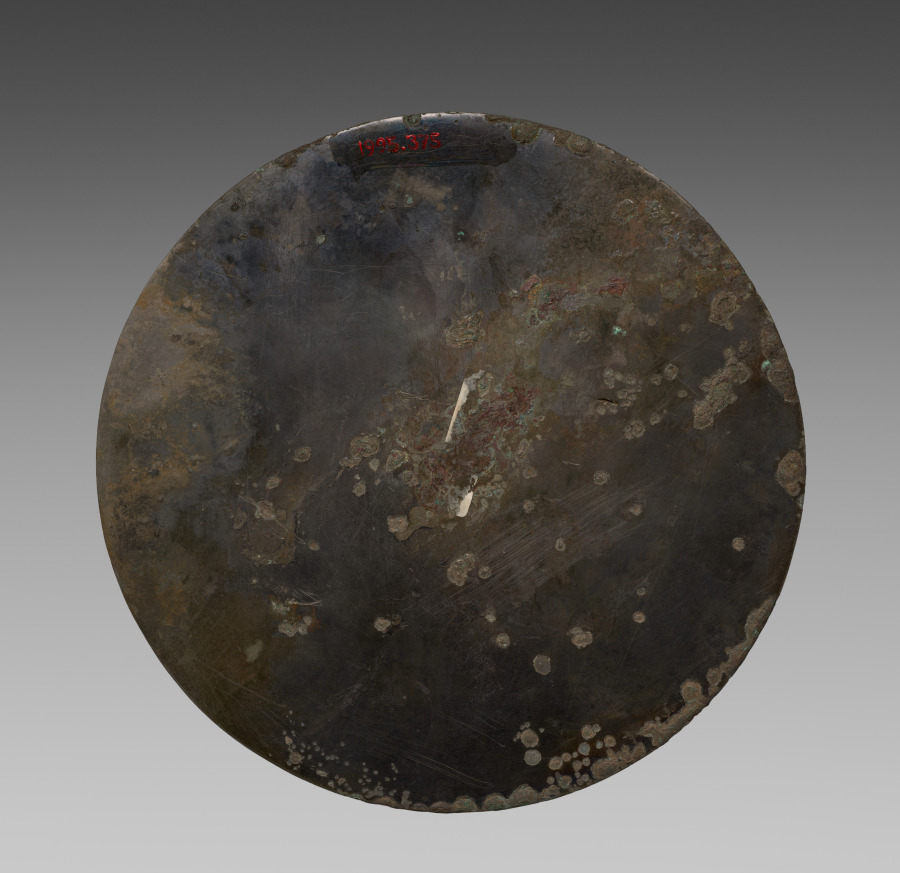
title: Octafoil Mirror with Lunar Palace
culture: China, Jin dynasty (1115–1234)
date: early 1100s–mid-1200s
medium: bronze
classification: Metalwork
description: Bronze mirrors typically have one polished and one decorated side and were used in tombs for ritual purpose or served as disks for reflection. This mirror depicts the imagined scene of the moon in Chinese mythology. Legend says that the goddess Chang E consumed the elixir of immortality that she stole from her husband, the archer Yi, and flew to the moon. Chang E’s palace, the Broad Cold Palace (Guanghan gong) on the left side of the composition, is juxtaposed with a tall pine tree symbolizing longevity.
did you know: A rabbit and a toad, both creatures believed to live on the moon, can be seen in the center.